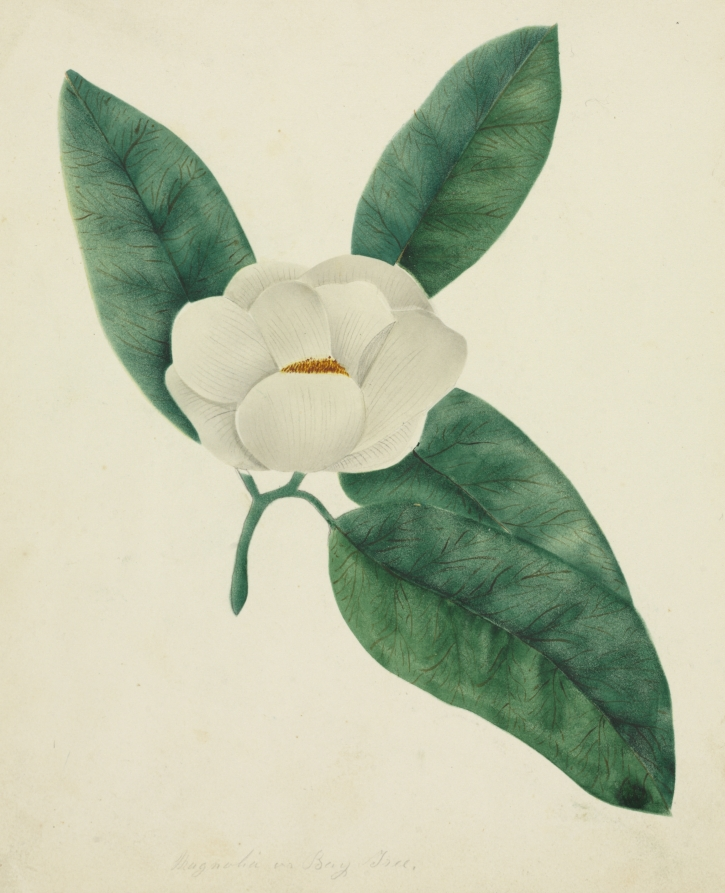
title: Magnolia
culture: America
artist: Mary Altha Nims (American, 1817–1907)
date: 1800s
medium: watercolor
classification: Drawing